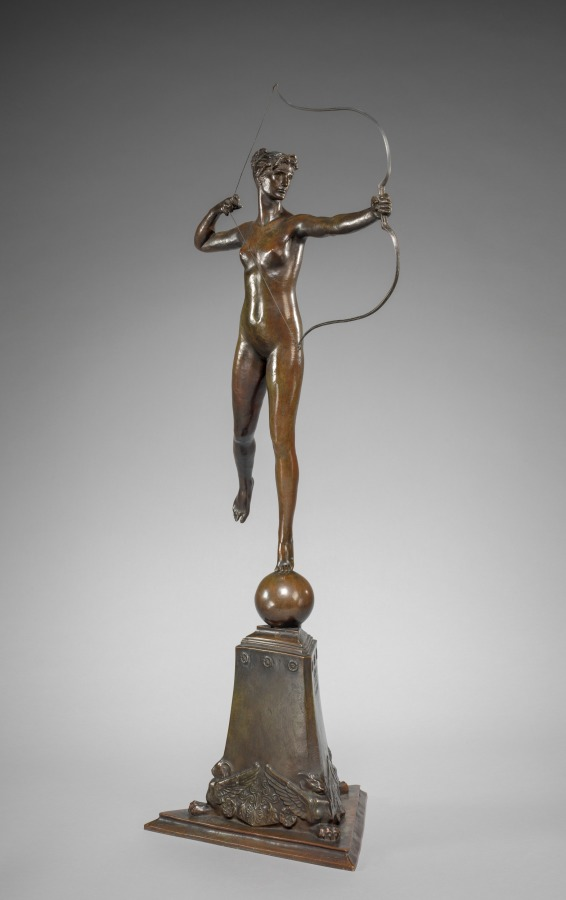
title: Diana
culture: America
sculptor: Augustus Saint-Gaudens (American, born Ireland, 1848–1907)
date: modeled 1899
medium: bronze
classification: Sculpture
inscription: Signed and dated on base: AUGUSTUS SAINT GAUDENS, MDCCCXCIX; inscribed on triangular base: DIANA OF THE TOWER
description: Depicting the Roman goddess of the hunt, Diana is a small version of the massive weathervane Augustus Saint-Gaudens designed for the second iteration of Madison Square Garden in New York, a building that was demolished in 1925. Although controversial for its nudity, the weathervane dominated the city's skyline and became a prominent landmark. Due to its popularity, Saint-Gaudens marketed tabletop versions of the sculpture, which were sold through high-end retailers such as Tiffany and Co.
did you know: The face of Diana was inspired by Davida Johnson Clark, the artist's longtime model, muse, and lover.